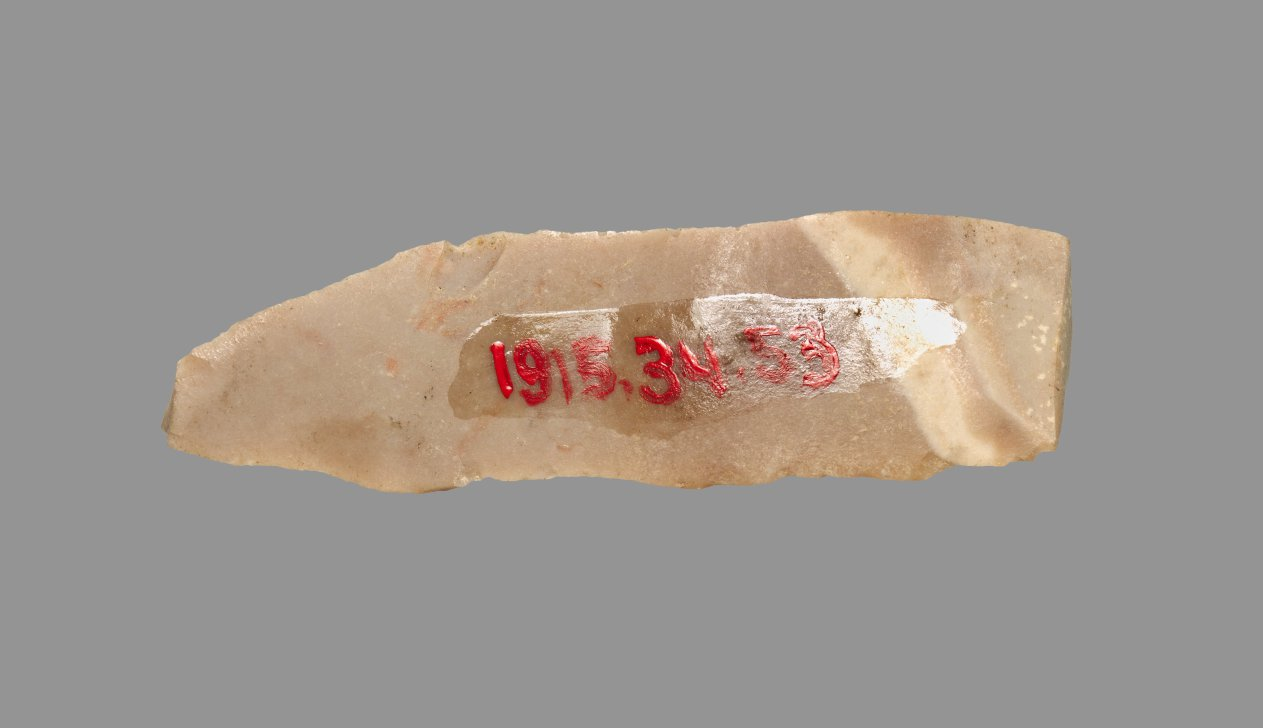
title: Sickle Blade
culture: Egypt, Middle Kingdom (2040–1648 BCE), Dynasty 12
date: 1980–1801 BCE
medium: flint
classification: Implements